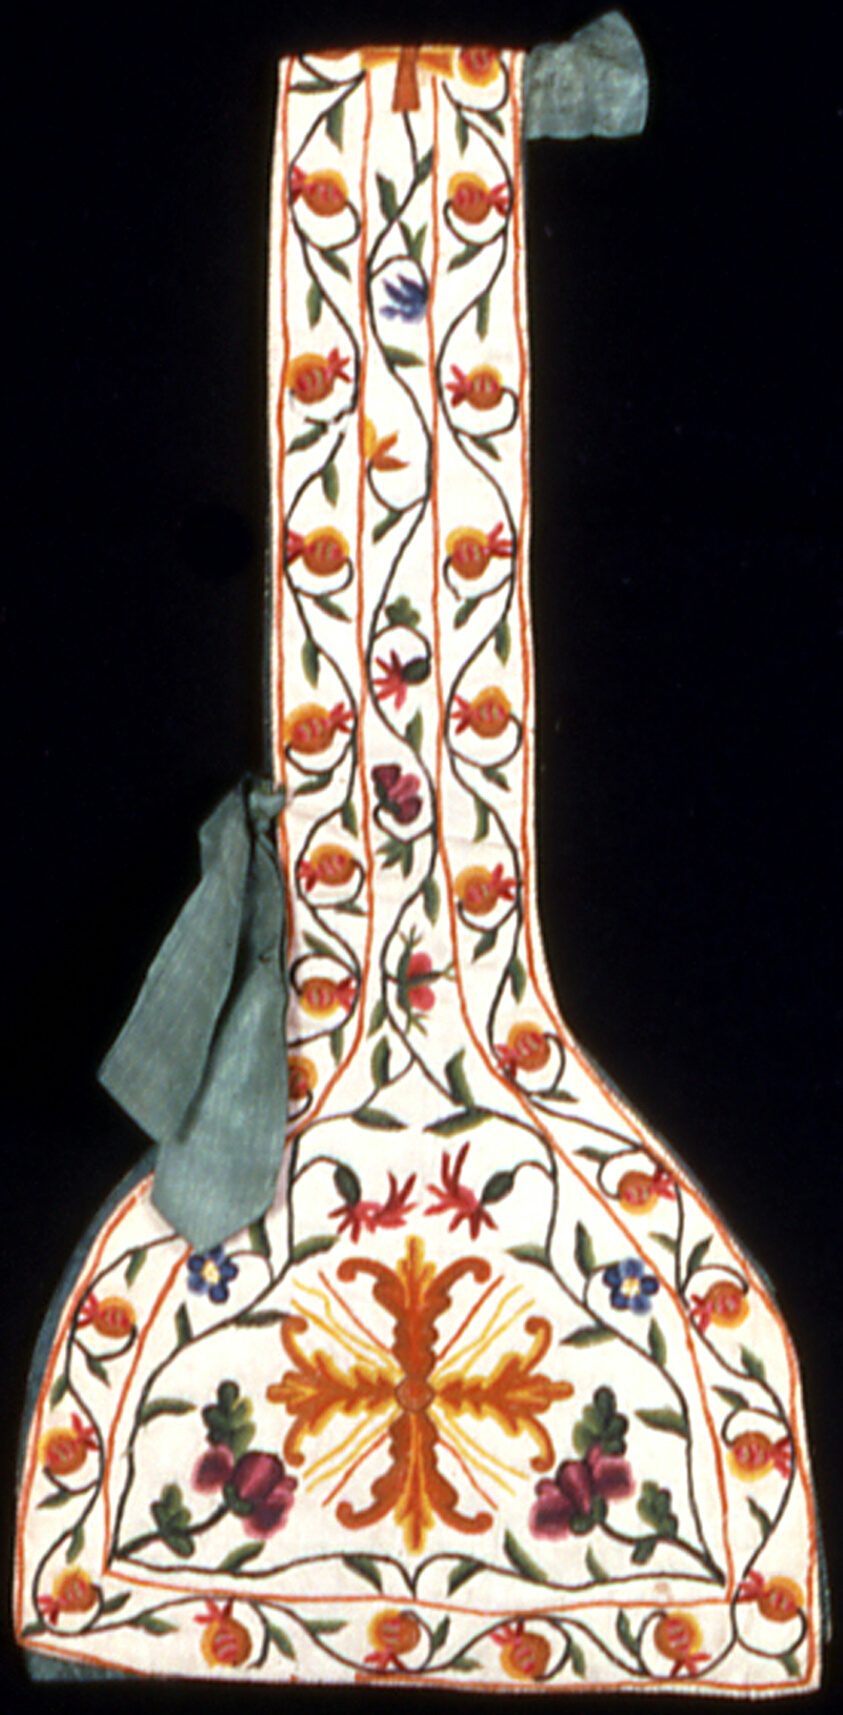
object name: Religious/Ritual Object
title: Maniple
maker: France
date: c. 1750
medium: Wool, 2:2 twill weave; embroidered with wool, in chain stitches and French knots with silk, plain weave ribbons; lined with silk, plain weave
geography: France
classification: textile; needlework (visual works); liturgical; ritual objects